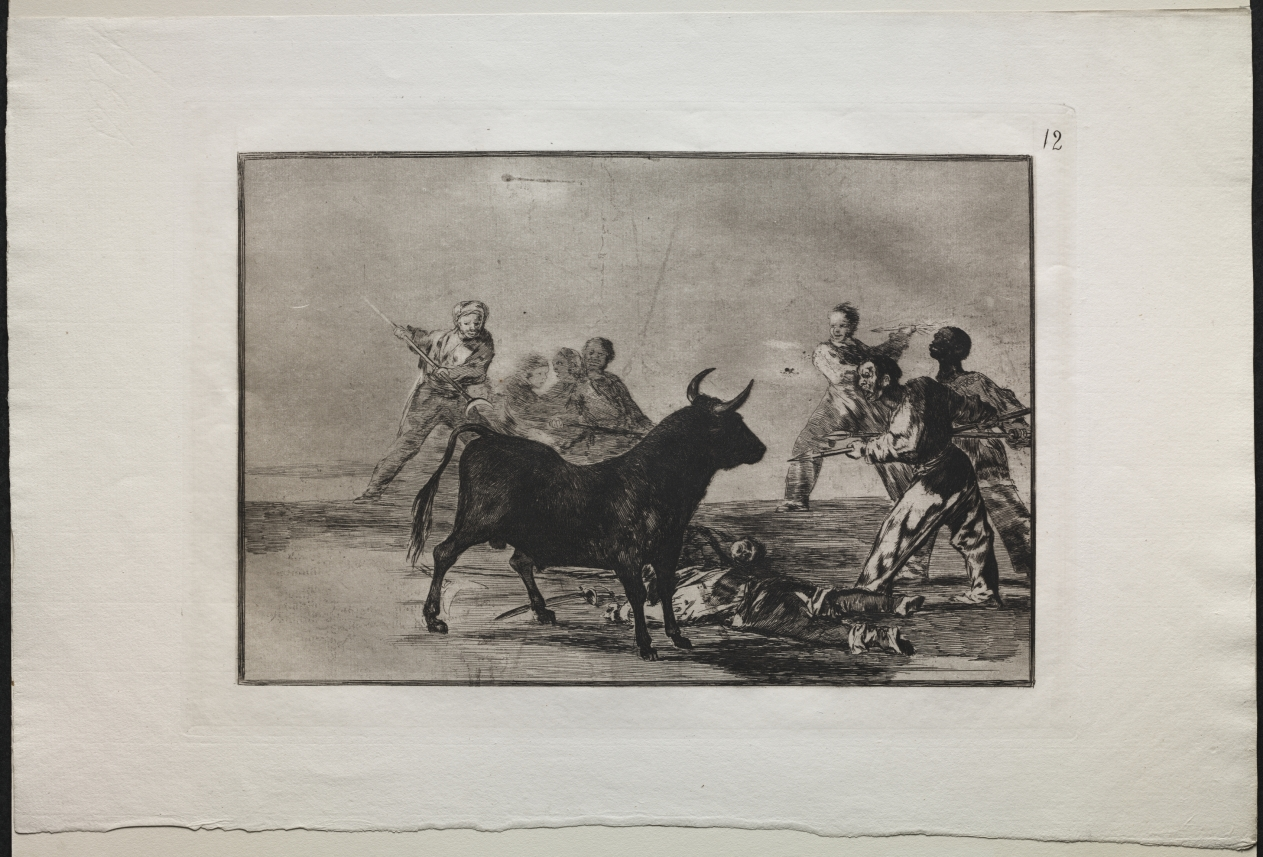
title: Bullfights: The Rabble Hamstringing the Bull with Lances, Sickles, Banderillas and Other Arms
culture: Spain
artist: Francisco de Goya (Spanish, 1746–1828)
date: 1816, printed 1876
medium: engraving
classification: Print